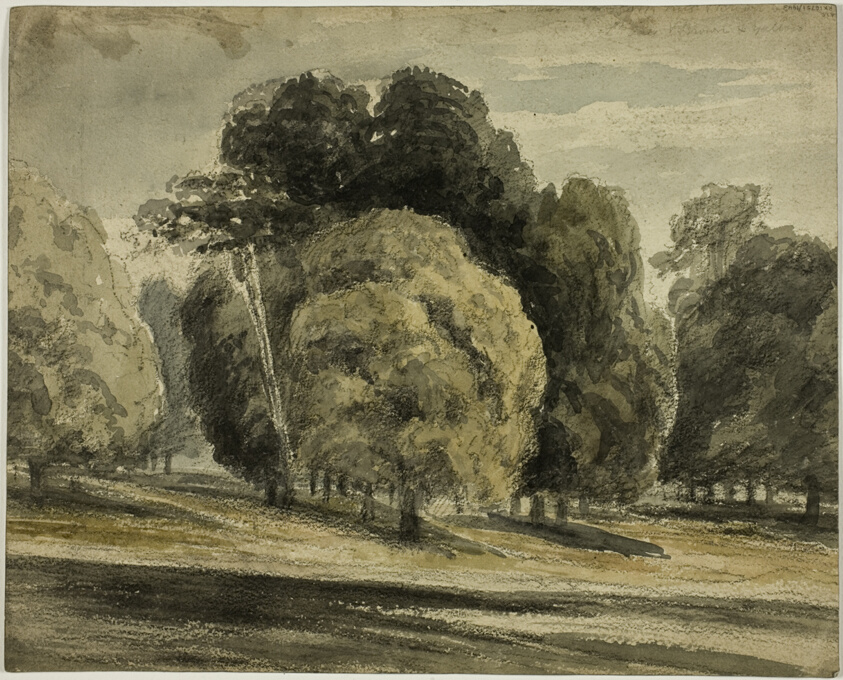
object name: Drawing and Watercolor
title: Two Horse Cart at Juncture in Road (recto); Park Landscape (verso)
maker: Unknown Artist (English 19th century); style of Peter De Wint (English, 1784-1849)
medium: Watercolor over graphite (recto), and watercolor with black chalk (verso), on ivory wove paper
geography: United Kingdom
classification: watercolor; drawings (visual works); prints and drawing